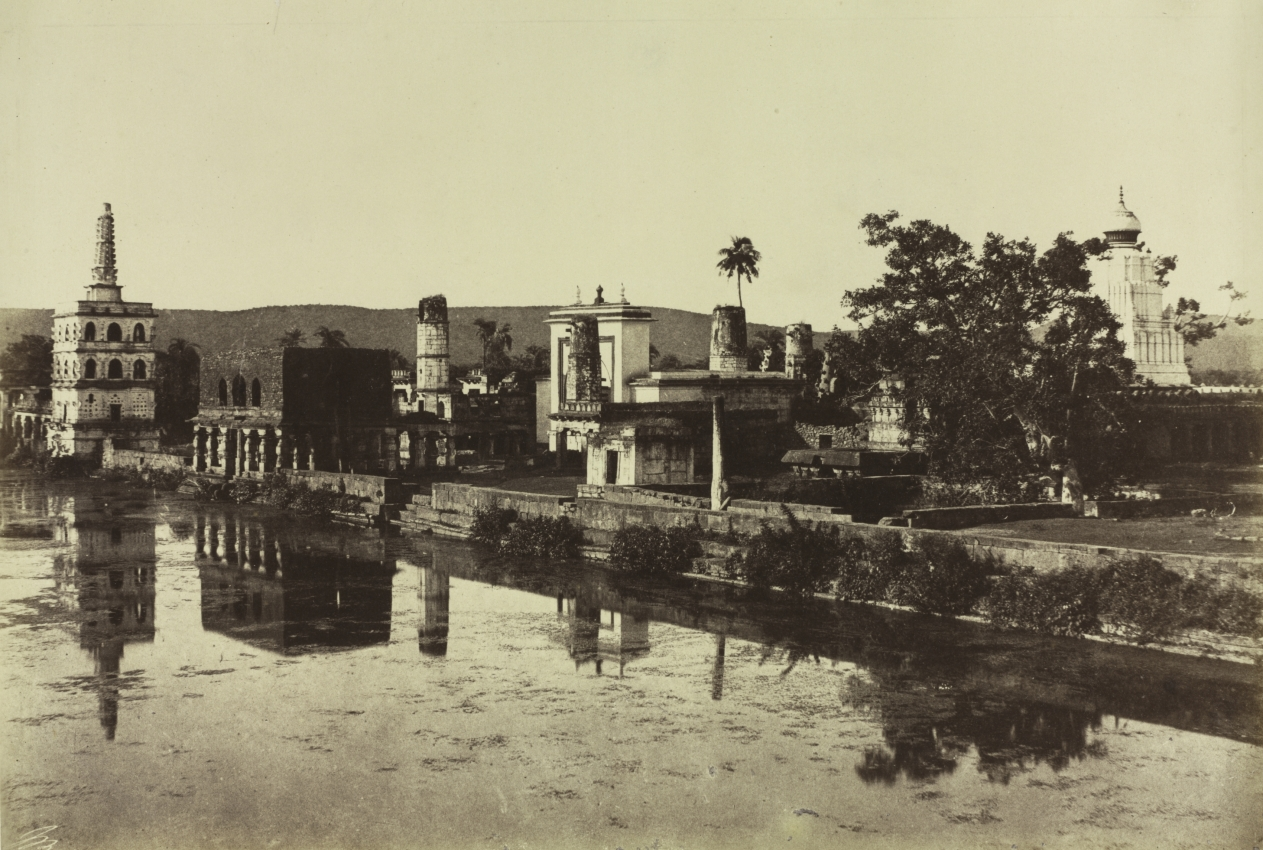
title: Tank and Temples at Bunshunkuree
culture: England, 19th century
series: Taylor, Col. Meadows; Architecture in Dharwar and Mysore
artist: Col. Thomas Biggs (British, 1822–1905)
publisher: J. Murray, pl. 88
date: c. 1857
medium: albumen print from wet collodion negative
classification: Photograph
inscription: Written in negative: [unclear signature ?]; in pencil: "Col. Biggs"